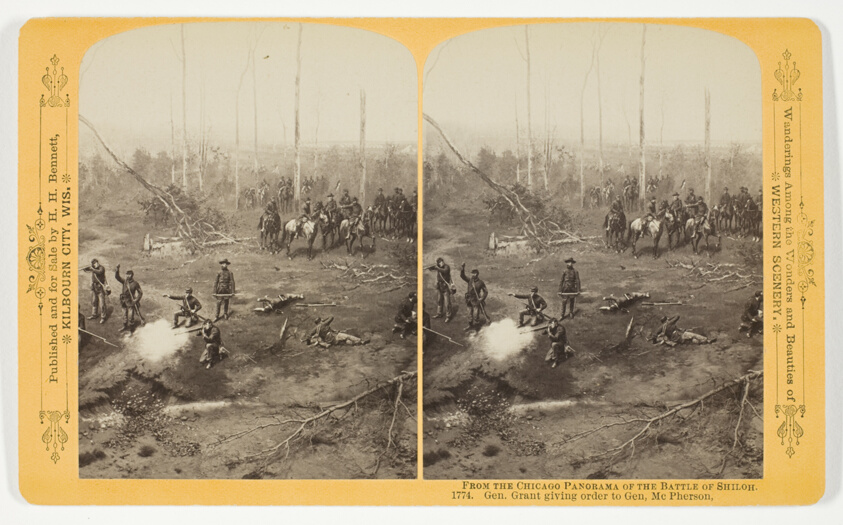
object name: Photograph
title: Gen. Grant giving order to Gen. McPherson, from the series "The Chicago Panorama of the Battle of Shiloh"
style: 19th century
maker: Henry Hamilton Bennett (American, born Canada, 1843-1908)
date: 1887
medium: Albumen print, stereo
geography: Chicago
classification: photography; photograph; albumen silver print; stereograph (albumen)